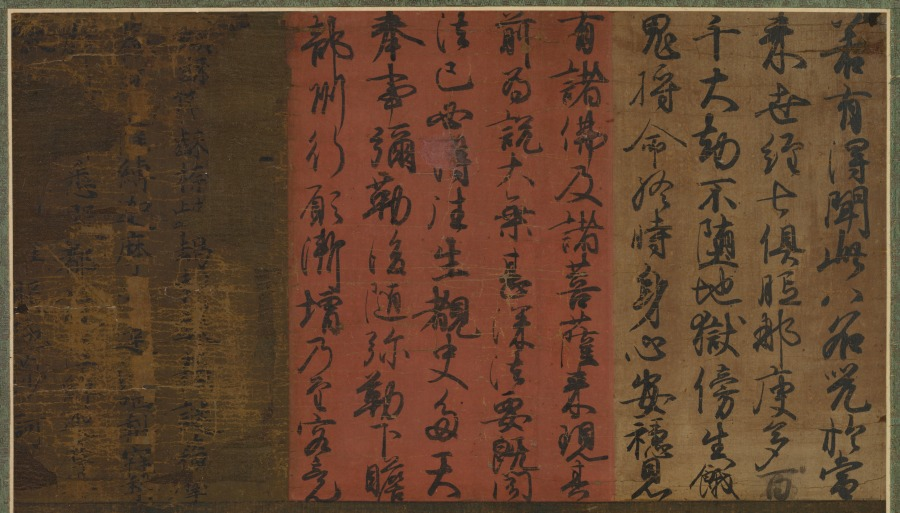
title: Miroku (Maitreya)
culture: Japan, Nanbokuchō period (1336–92)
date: 1300s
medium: Hanging scroll, ink, color, gold, and cut gold on silk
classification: Painting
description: In this image the figure of Miroku, Maitreya in Sanskrit, is richly adorned with gauzy fabrics, opulent jewels, and an intricate gold crown containing five seated Buddhas. Buddhist teachings say that Miroku will descend to Earth as a Buddha to restore Buddhist doctrine at the end of a long period of decline. Here he is represented as a bodhisattva, a being who has attained enlightenment but has chosen to postpone becoming a Buddha to help others reach enlightenment. Above the painting, three inscriptions present portions of a sacred text related to Miroku. A close look at the bodhisattva’s right side where fragile pigments have fallen away reveals writing on the back of the silk on which the image is painted— something its mounters never expected to be seen.